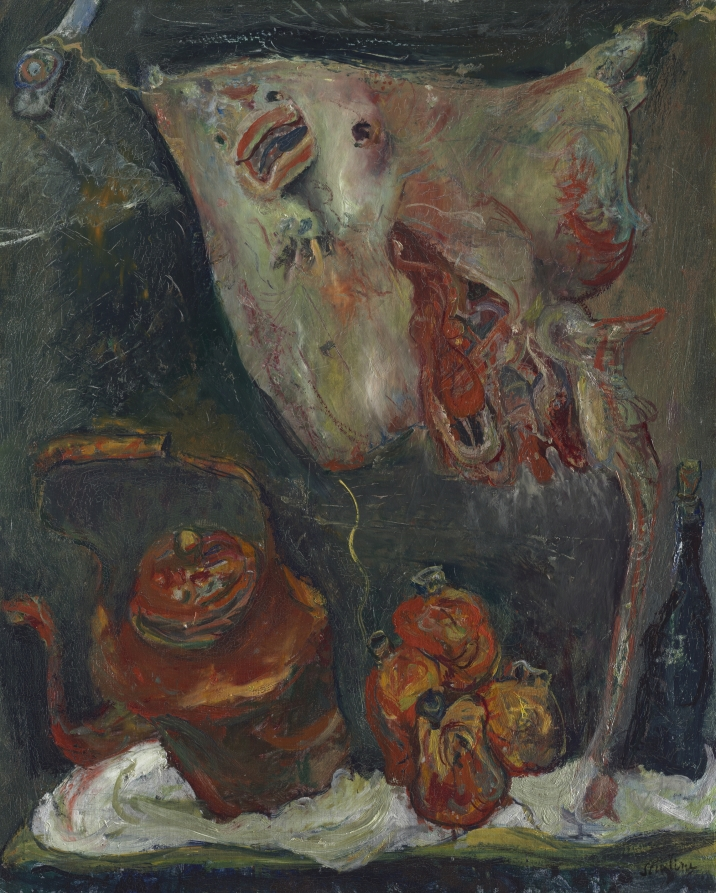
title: Still Life with Rayfish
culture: Russia (worked in France), 20th century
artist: Chaïm Soutine (Russian, 1893–1943)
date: 1923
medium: oil on canvas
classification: Painting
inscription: Signed lower right: "Soutine"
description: The mutilated ray fish in this painting is strung across the top of the canvas, as if tortured or crucified, as its internal organs spill forth. The fish seems to express human anguish, transforming it into a powerful metaphor for suffering. Below the fish is a kettle that seems to twist away from the fish. Chaïm Soutine frequently depicted animal carcasses in his paintings, highlighting their vulnerability and the violence of their deaths. Such paintings may allude to his own despair, from his youth as the 10th of 11 children of parents in poverty in a small Orthodox Jewish community in what is now Belarus, to his early years in Paris as a struggling artist.